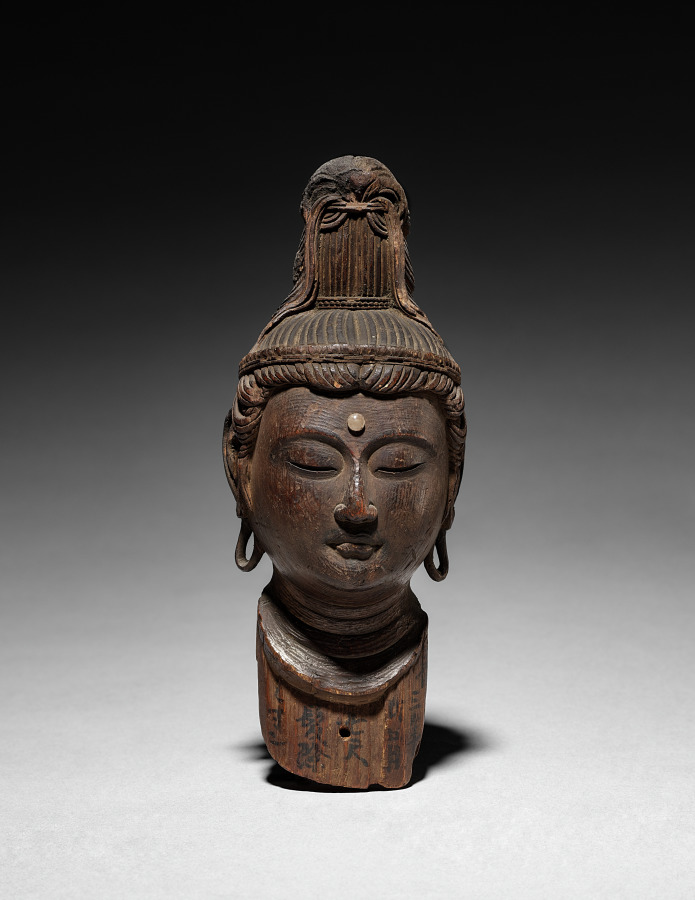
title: Head of Kannon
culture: Japan, Edo period (1615–1868)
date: late 1600s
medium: wood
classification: Sculpture